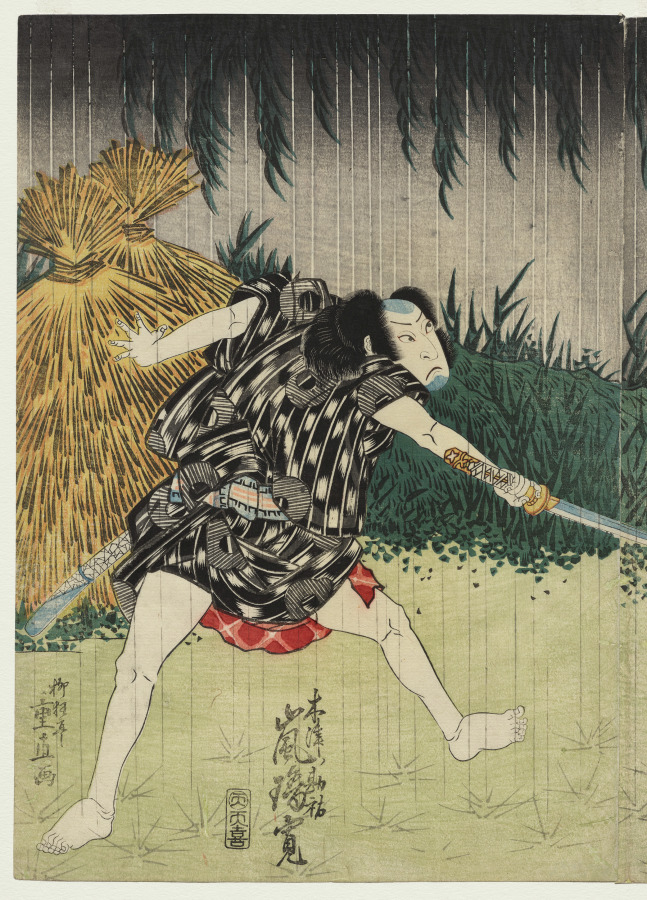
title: Arashi Rikan II as Kizu Kansuke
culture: Japan, Edo period (1615–1868)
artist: Shigenao (Japanese)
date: 1829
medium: color woodblock print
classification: Print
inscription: Signature: Ryukyotei Shigenao ga Publisher: Temmaya Kihei (Tenki, emblem)